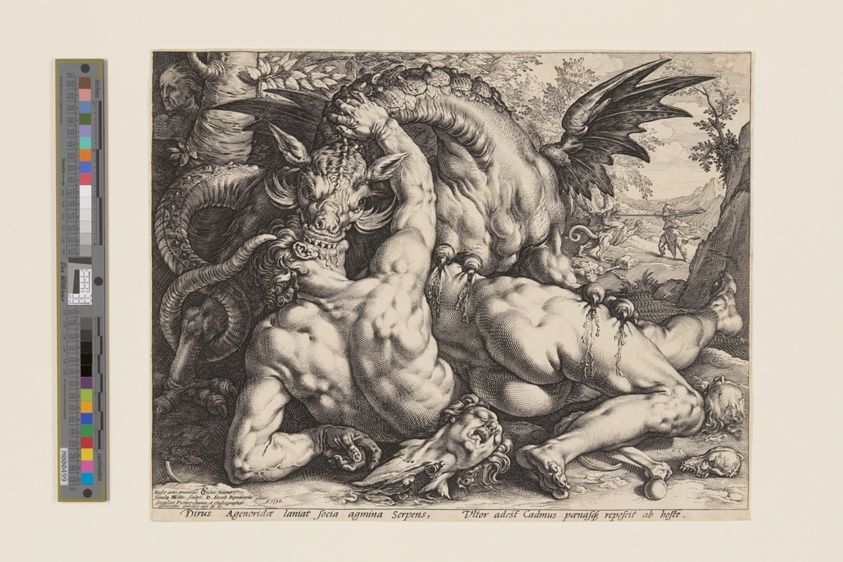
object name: Print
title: The Dragon Devouring the Companions of Cadmus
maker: Hendrick Goltzius (Dutch, 1558–1617); after Cornelis van Haarlem (Dutch, 1562-1638)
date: 1588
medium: Engraving on ivory laid paper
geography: Netherlands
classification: engraving; paper; print; prints and drawing